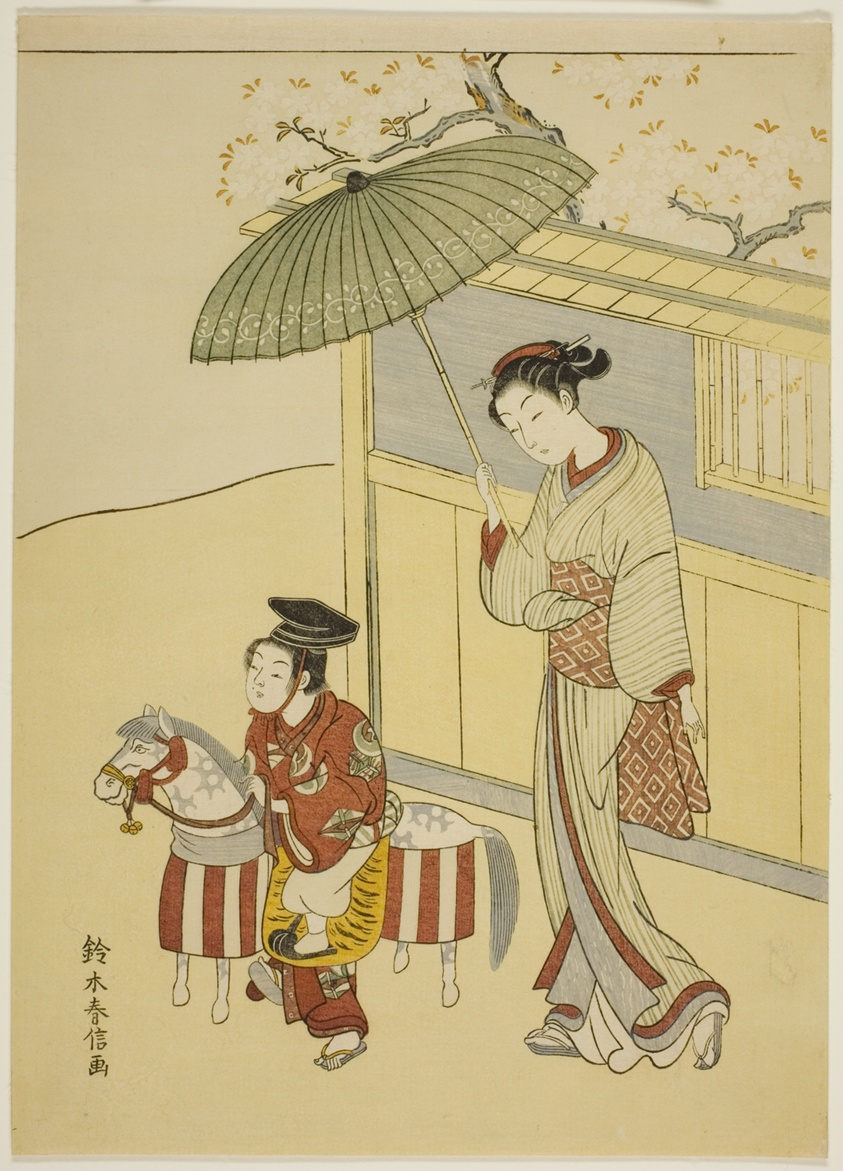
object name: Print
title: The Hobby Horse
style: Japanese (culture or style)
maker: Suzuki Harunobu 鈴木 春信; Japanese, 1725 (?)-1770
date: c. 1767/68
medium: Color woodblock print; chuban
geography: Japan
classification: woodblock print; print; asian art